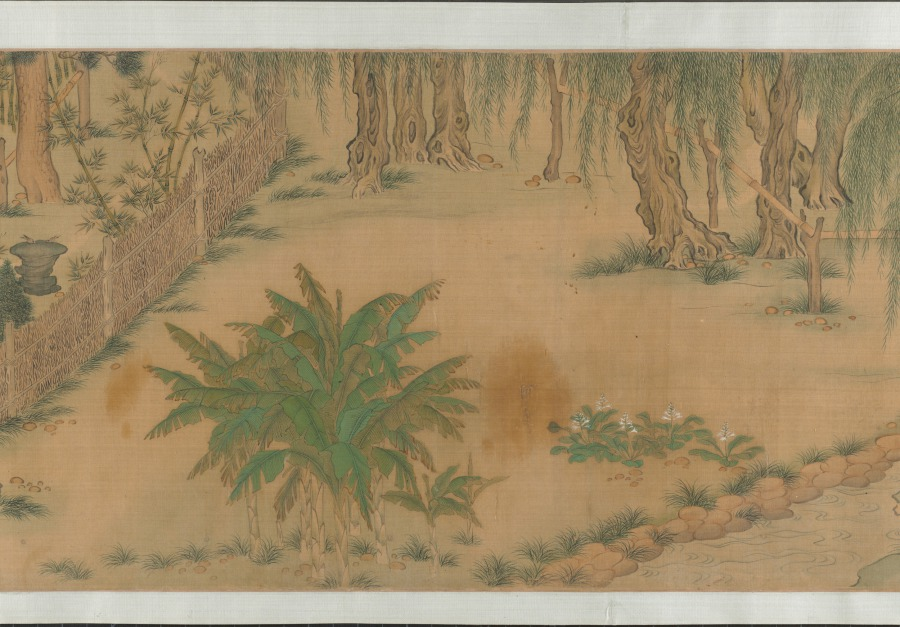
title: Garden for Solitary Enjoyment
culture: China, Ming dynasty (1368–1644)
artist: Qiu Ying (Chinese, 1494–1552)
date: 1515–52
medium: Handscroll; ink and light color on silk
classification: Painting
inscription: Accompanying text of an essay together with seven poems of Sima Guang (1019–1086) and one poem of Su Shi (1037–1101) written by Wen Zhengming (1470–1559) in 1558.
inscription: 2 colophons and 82 seals: 4 seals of Wen Zhengming 文徵明 (1470–1559); 59 seals of Xiang Yuanbian 項元汴 (1525–1590); 1 colophon, dated 1644, and 7 seals of Xiang Yukui 項禹揆 (c. late 1500s–1659); 1 colophon, dated 1880, and 2 seals of Weng Tonghe 翁同龢 (1830–1904); 2 seals of Ch'eng Chen-i (19th c.); 1 seal of Han Ch'ung (19th c.); 4 seals of Wan-go H. C. Weng 翁萬戈 (1918–2020); 3 seals unidentified.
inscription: Colophon by Xiang Yukui 項禹揆 (c. late 1500s–1659): The painting of The Garden for Self-enjoyment on the right by Shih-chou, Mr. Qiu [Qiu Ying] is in the style of Li Lung-mien. Its mood is peaceful, as if meeting the ancient gentlemen face to face among the brushes and silk; it lifts one above the sordid bustle of life. Formerly, my late father handed me this scroll which had only the painting without the written essay. I considered asking a good calligrapher to write the essay to add to it but was afraid that the quality of the writing would not match the painting. Several years later, I saw at a friend's house this essay and poems (of Ssu-ma Kuang] written by Hengshan [Wen Zhengming], once owned by my grandfather; so I spared no expense to obtain it. I rejoiced at this and said: "The divine swords are finally united. How things are pre-destined!" Now my friend Chang Kung-chao's technique for mounting [painting and calligraphy] is excellent. Therefore by daring to take them out and join them together, I can preserve this beautiful story of singular reunion. Xiang Yukui recorded at Hai-yeh-t'ang [hall] two days before New Year's Eve in the jiasheng year of the Chongzhen era [1644]. trans. LYSL/HK/WKH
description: Garden of Solitary Enjoyment refers to a site built in 1073 by the statesman Sima Guang (1019–1086) after he had retired to Luoyang, Henan province. Every spring, visitors would flock to his garden. Each of its seven structures references a historic figure. Sima wrote: I channel streams [like Du Mu], to water flowers [like Bai Juyi], or trim bamboo [like Wang Huizhi]. . . . I know of no joy between heaven and earth that could take its place. Qiu Ying’s painting, created after an 11th-century version of the same theme, must have appealed to garden owners of the Ming dynasty, since it became the template for numerous Suzhou workshop copies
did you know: Sima Guang completed his monumental survey of Chinese history, Zizhi tongjian, in the garden depicted in this painting.